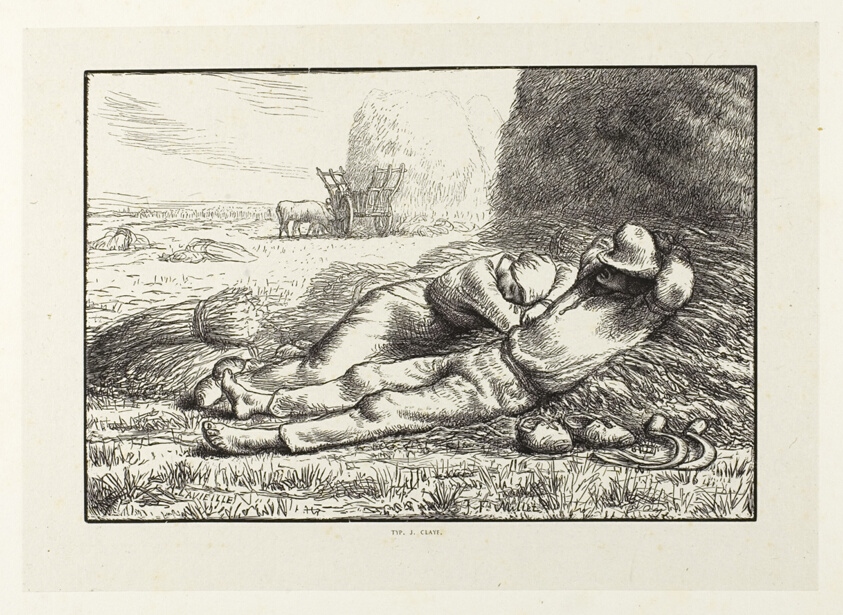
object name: Print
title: Noon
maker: Jacques Adrien Lavieille (French, 1818-1862); after Jean François Millet (French, 1814-1875); printed by Jules Claye (French, 1806-1886)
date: 1860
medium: Wood engraving on light gray China paper on ivory wove paper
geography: France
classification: wood engraving; print; prints and drawing